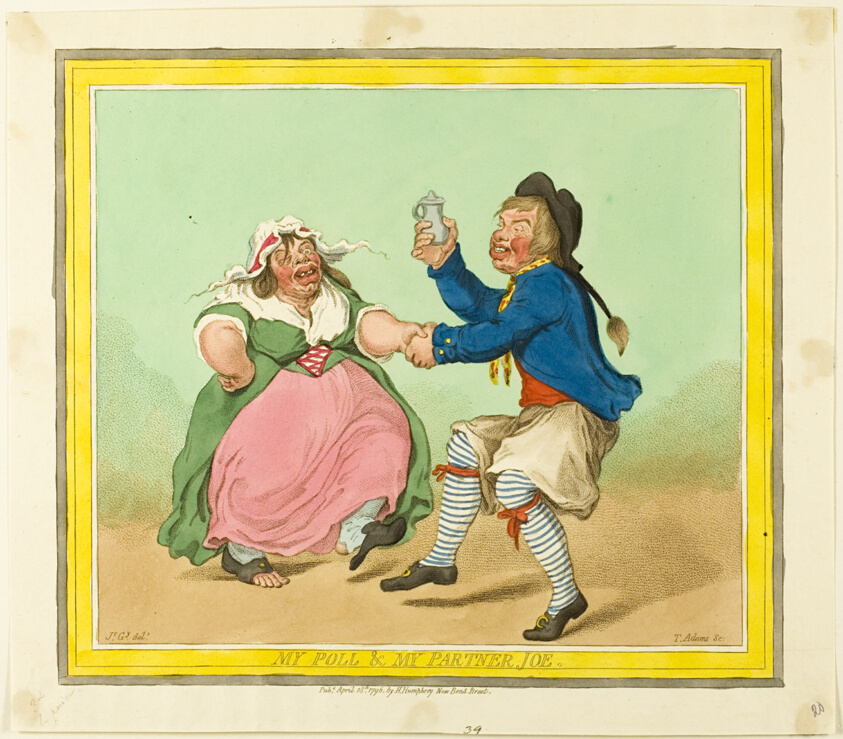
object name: Print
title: My Poll and my Partner Joe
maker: James Gillray (English, 1756-1815); published by Hannah Humphrey (English, c. 1745-1818)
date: published April 18, 1796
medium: Etching in dark brown, with handcoloring and stipling, on cream wove paper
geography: England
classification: etching; print; prints and drawing